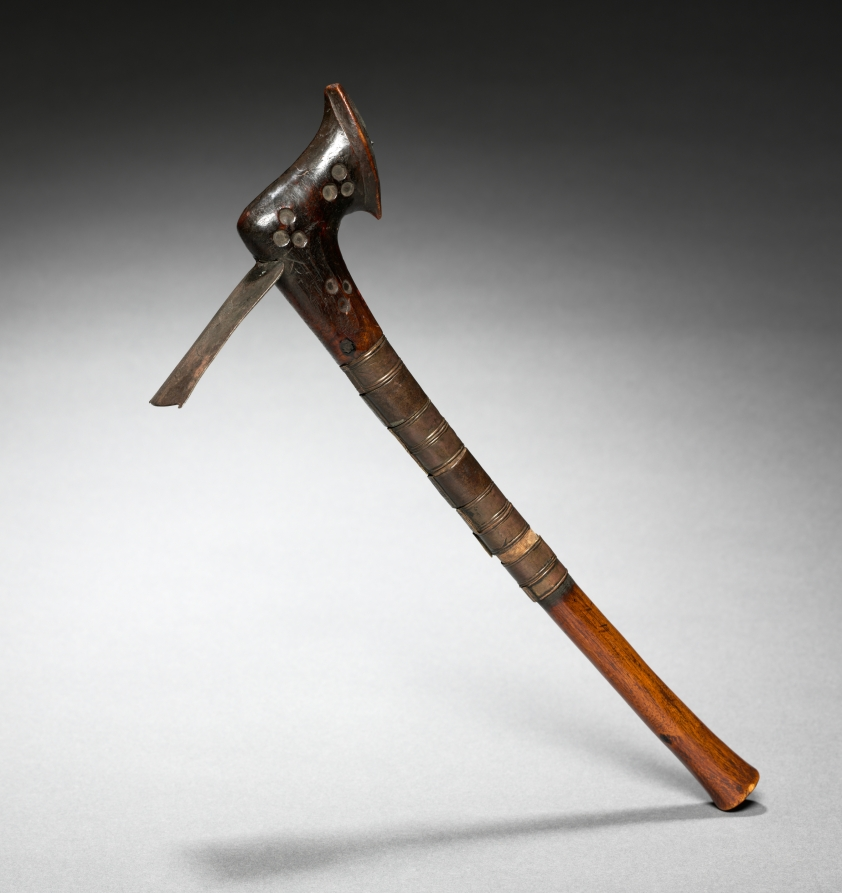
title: Ceremonial Hoe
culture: Africa, Southern Africa, South Africa, possibly Zulu-style maker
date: early 1900s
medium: Wood and copper alloy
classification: Implements